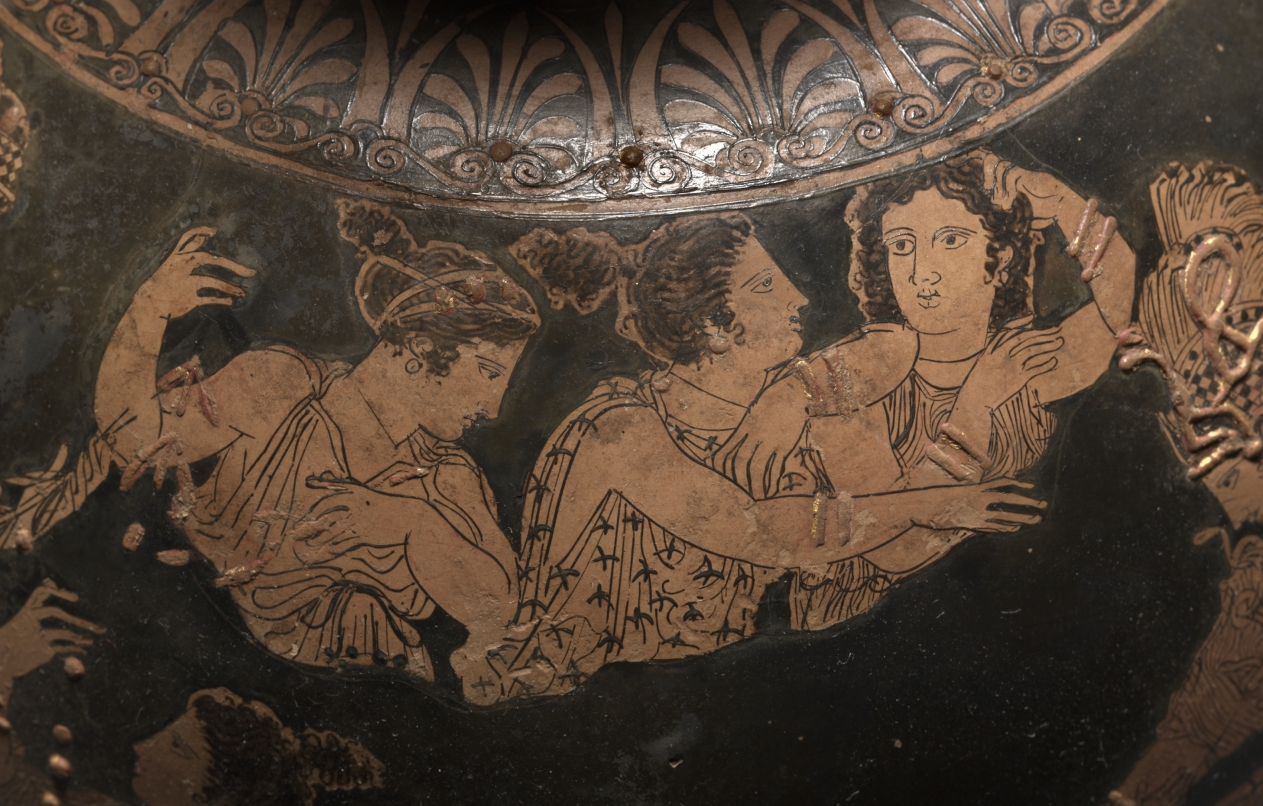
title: Red-Figure Squat Lekythos (Oil Vessel): Birth of Erichthonios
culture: Greek, Attic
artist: attributed to Meidias Painter (Greek, Attic, active c. 420–400 BCE)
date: c. 420–410 BCE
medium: ceramic, with gilding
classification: Ceramic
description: The central group on this vase shows the seated earth goddess Ge (also known as Gaia) handing her baby, Erichthonios, to Athena. Conceived from the seed of Hephaistos, Erichthonios would go on to become a king of Athens, and the story of his birth became popular in Athenian art of the fifth century BC. Other representations include Hephaistos as well as Kekrops, the mythical first king of Athens, sometimes together with Zeus and other deities. But this one includes only female onlookers—likely the three daughters of Kekrops watching from above, with Aphrodite and several abstract personifications such as Peitho (Persuasion) and Eudaimonia (Happiness) standing and seated nearby.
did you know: A lead rivet sits at the junction of handle and neck, probably an ancient repair.